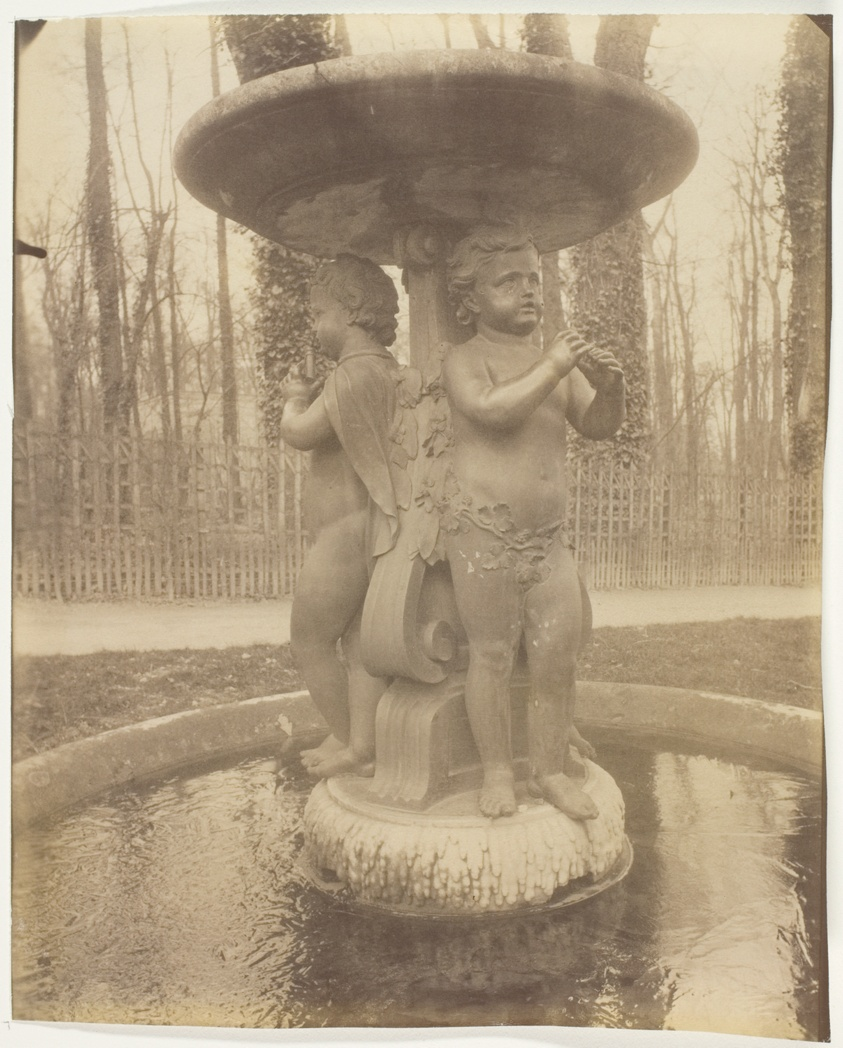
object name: Photograph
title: Versailles, Le Parc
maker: Jean-Eugène-Auguste Atget (French, 1857–1927)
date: 1906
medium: Albumen print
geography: France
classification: albumen silver print; photographic process; photography; photograph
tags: Collected by Hugh Edwards